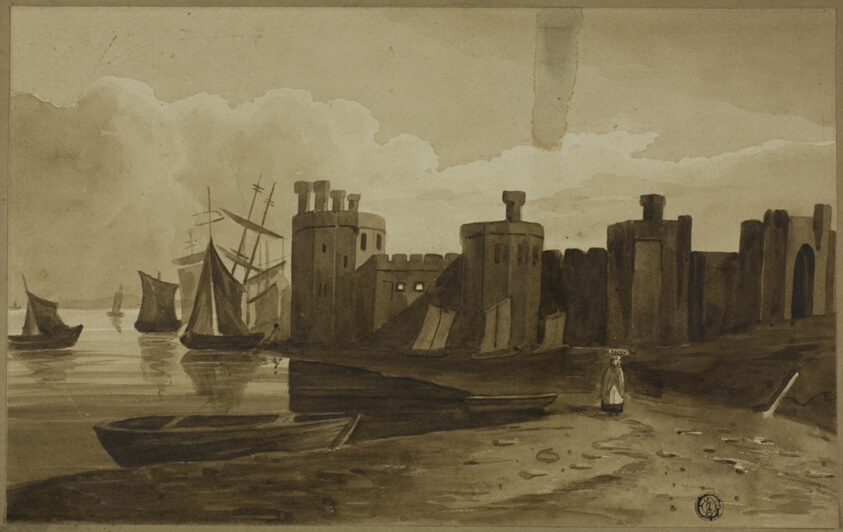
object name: Drawing and Watercolor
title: Cornarvan Castle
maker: Unknown Artist; English, n.d.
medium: Brush and brown wash, over graphite, on cream wove paper, laid down on brown laminate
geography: England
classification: ink or chalk wash; drawings (visual works); prints and drawing